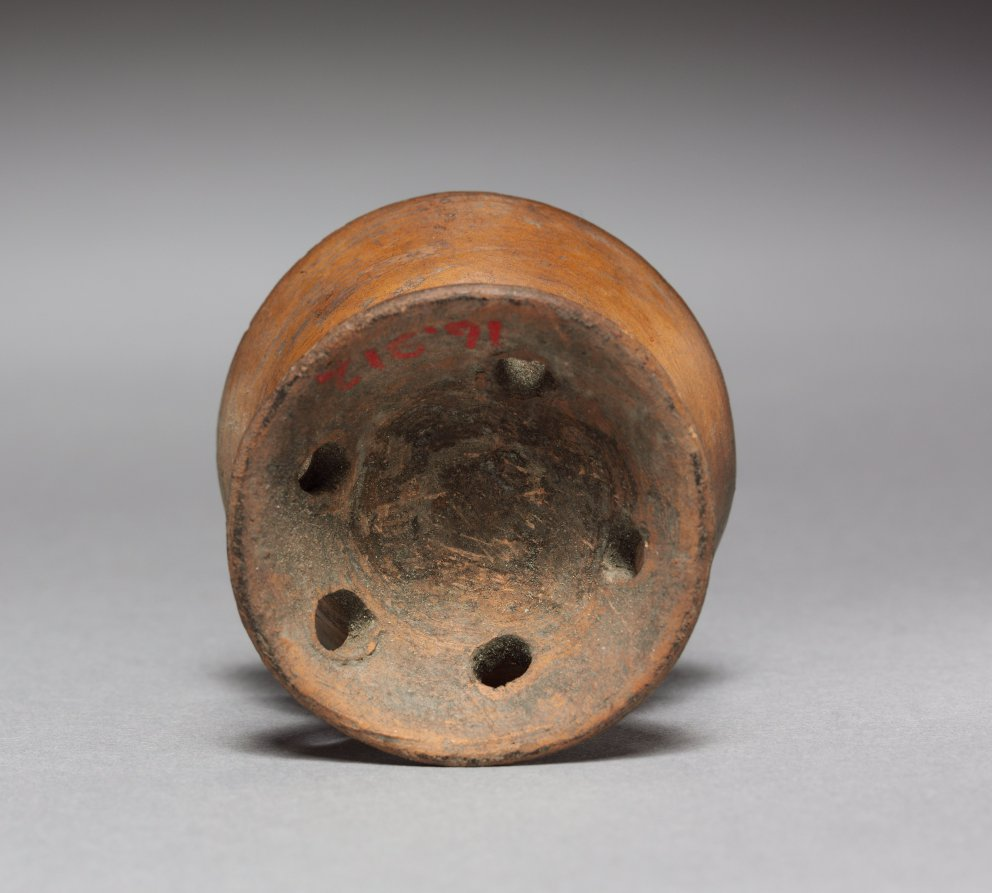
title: Dish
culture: Mexico, 16th century or earlier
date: before 1521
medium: terracotta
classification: Ceramic